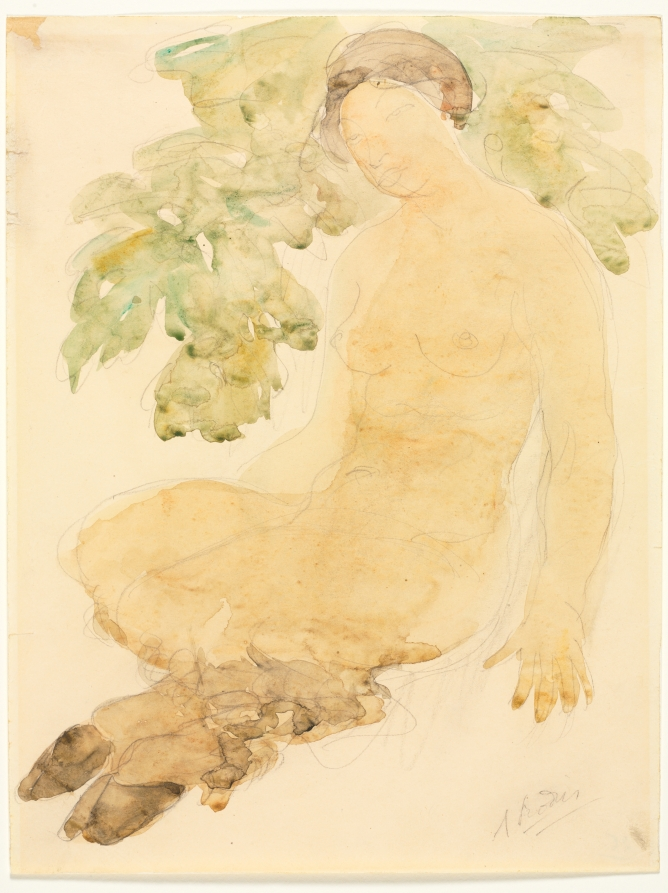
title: Faunesse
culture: France, late 19th-early 20th Century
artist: Auguste Rodin (French, 1840–1917)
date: c. 1905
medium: watercolor over graphite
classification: Drawing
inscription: signed, lower right, in graphite: A. Rodin [twice underlined] ; VERSO, lower left, in graphite [?]: 26 [underlined]